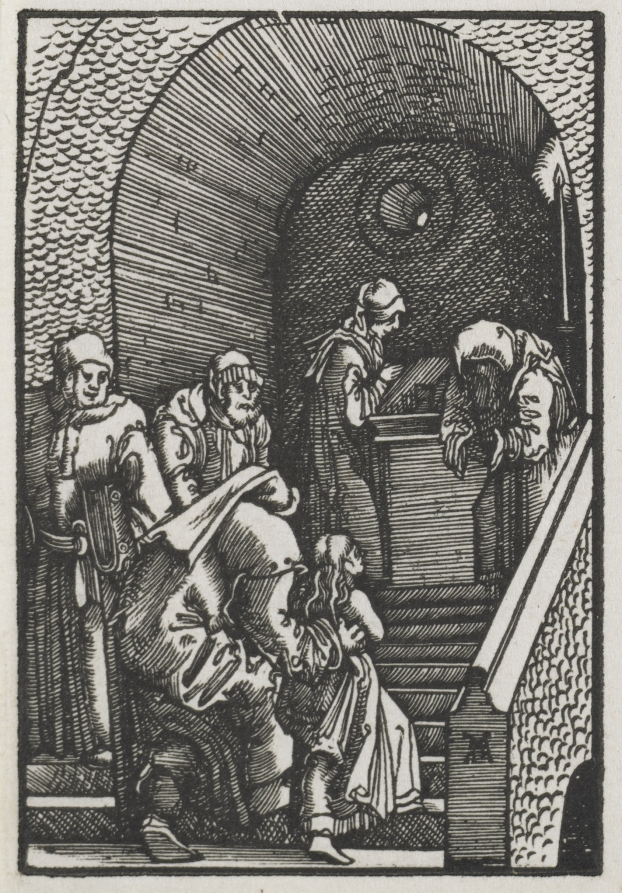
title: The Fall and Redemption of Man: The Presentation of the Virgin in the Temple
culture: Germany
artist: Albrecht Altdorfer (German, c. 1480–1538)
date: 1515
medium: woodcut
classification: Print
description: These eight woodcuts come from a series of forty which illustrate the story of Christian redemption from original sin to the Last Judgement. Probably to maximize printing efficiency and quality, eight woodblocks were printed on each of five sheets of paper, but the subjects are not in the correct chronological order. Prior to sale, the sheets were cut into eight pieces. The sheets in the museum's set were only cut in half, preserving four prints per page. The numbers after the titles of the individual images indicate each scene's place within the narrative. By 1513, Altdorfer had already executed a number of small, finely detailed engravings. Because it is difficult to achieve the same degree of precision using woodcut, The Fall and Redemption of Man is a technical tour de force. Probably inspired by Albrecht Dürer's Small Passion (1511)-but almost double the size-the only contemporaneous comparable set of fine miniature woodcuts, Dance of Death, was designed by Hans Holbein in about 1526 (on view nearby).